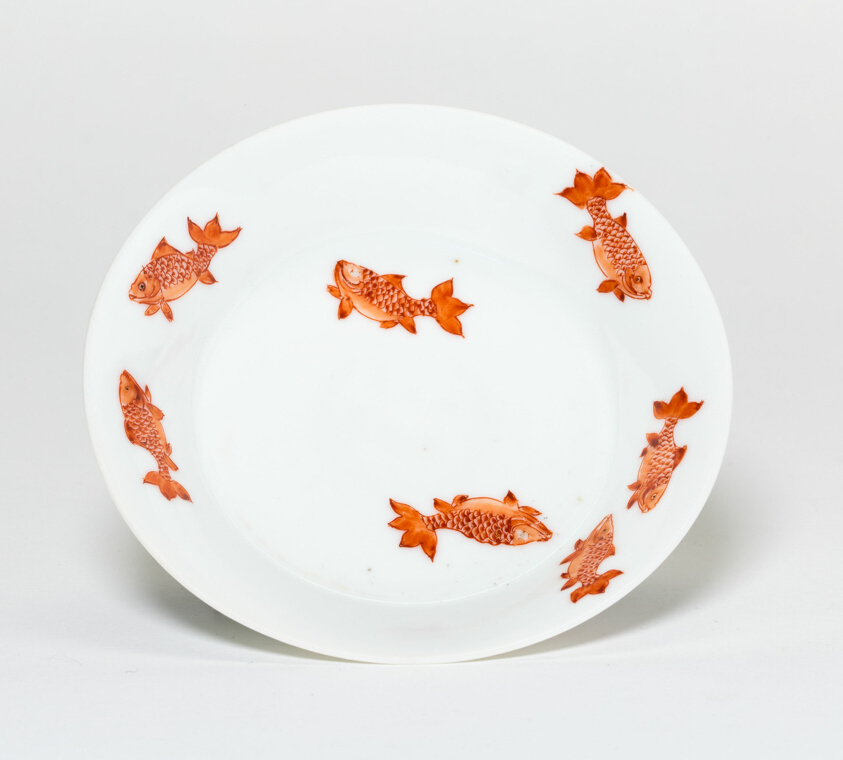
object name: Vessel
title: Dish with Ten Fish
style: Chinese (culture or style)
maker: China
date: Qing dynasty (1644–1911), Yongzheng peirod (1723–1735)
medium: Porcelain painted in underglaze iron red, possibly refired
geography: China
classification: dish (vessel); porcelain; ceramics; asian art; vessel